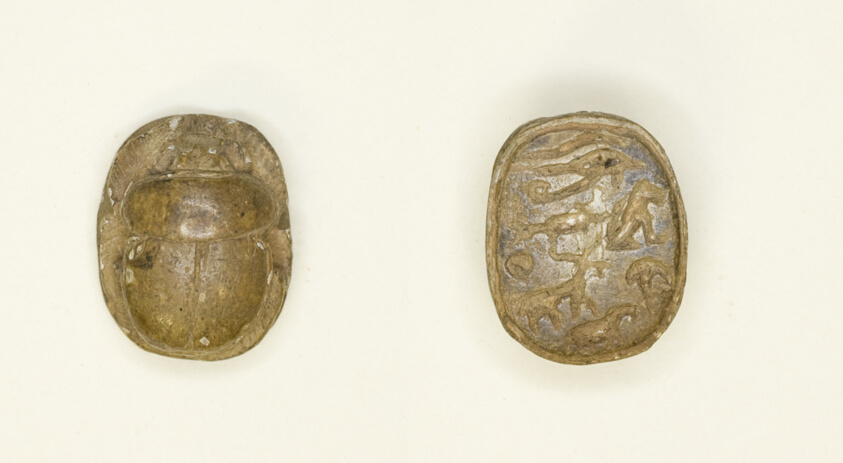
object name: Costume and Accessories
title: Scarab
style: egyptian, third intermediate period, late period (egyptian), ancient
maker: Egyptian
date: Third Intermediate Period–Late Period, Dynasties 21–26 (about 1069–525 BCE)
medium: Steatite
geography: Egypt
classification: scarab; ancient art; costume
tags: scarab beetle, insects, eye of Horus, animals